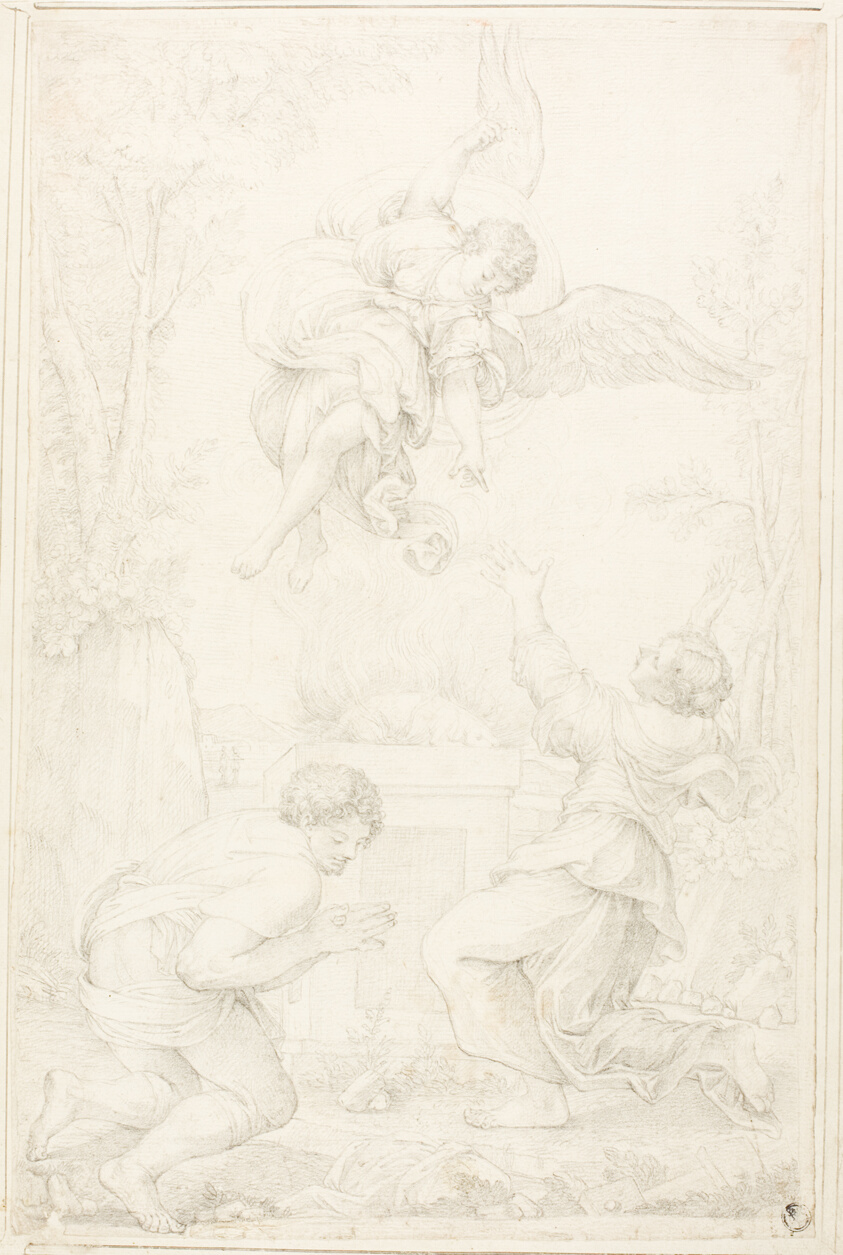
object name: Drawing and Watercolor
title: Sacrifice of Manoah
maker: Possibly Michel Corneille (French, c. 1601-1664); or possibly Carlo Maratti (Italian, 1625-1713)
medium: Black chalk, on ivory laid paper, laid down on ivory laid card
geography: France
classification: graphite; drawings (visual works); prints and drawing